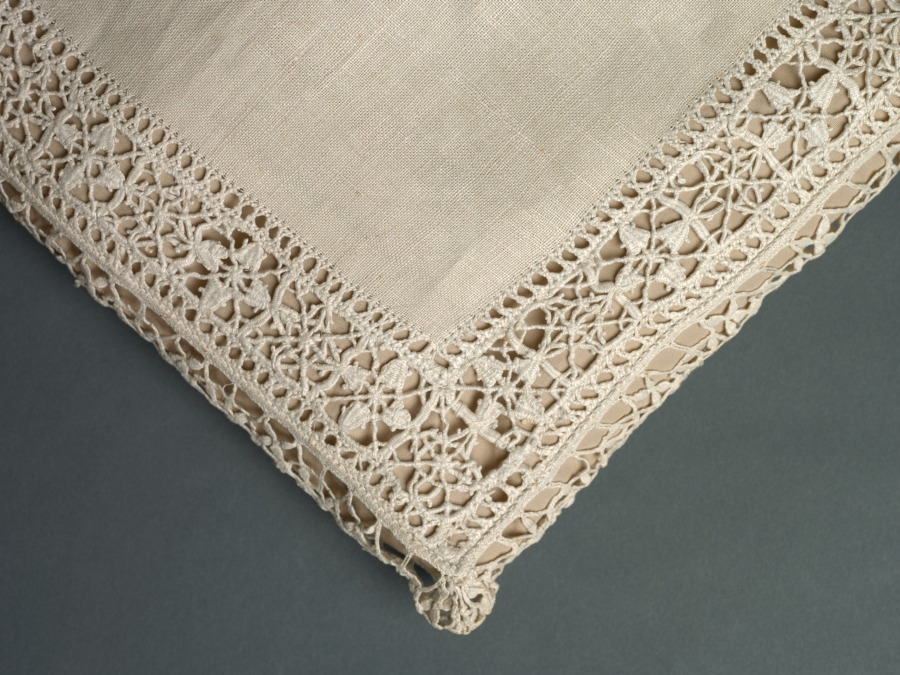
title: Lace Pillow Cover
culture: Italy, Genoa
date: 1600s–1700s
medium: Linen: needle lace (reticella) and bobbin lace edging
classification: Lace